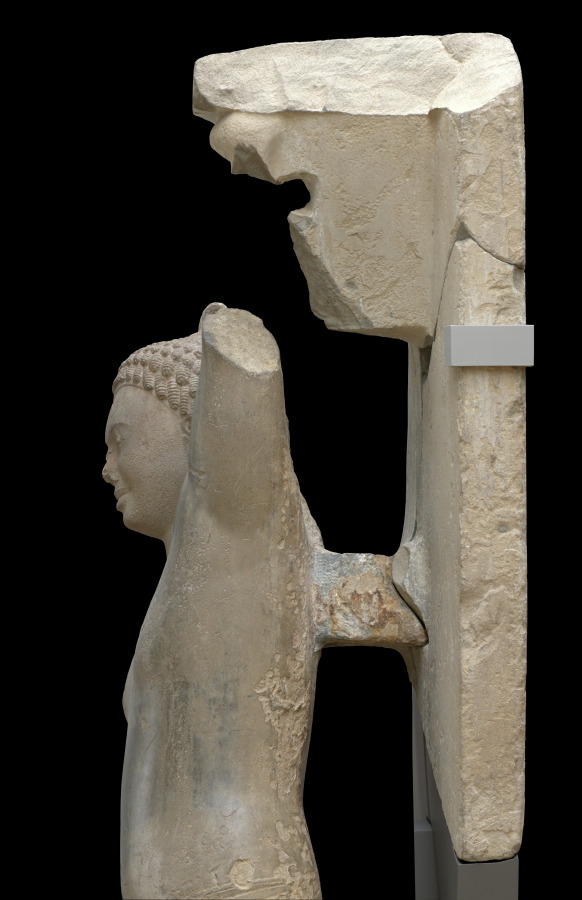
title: Krishna Lifting Mount Govardhan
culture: Southern Cambodia, Takeo Province, Phnom Da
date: c. 600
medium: Sandstone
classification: Sculpture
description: This masterwork of early Cambodian sculpture shows the Hindu god Krishna effortlessly holding aloft a mountain to protect his fellow villagers and herds from torrential storms sent by a jealous old god. It is one of eight monumental monolithic figures recovered from a two-peaked mountain in the floodplains of the Mekong River delta, on the outskirts of the ancient urban center of Angkor Borei.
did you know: Gold earrings were once fastened to the sculpture using holes in the figure's earlobes.